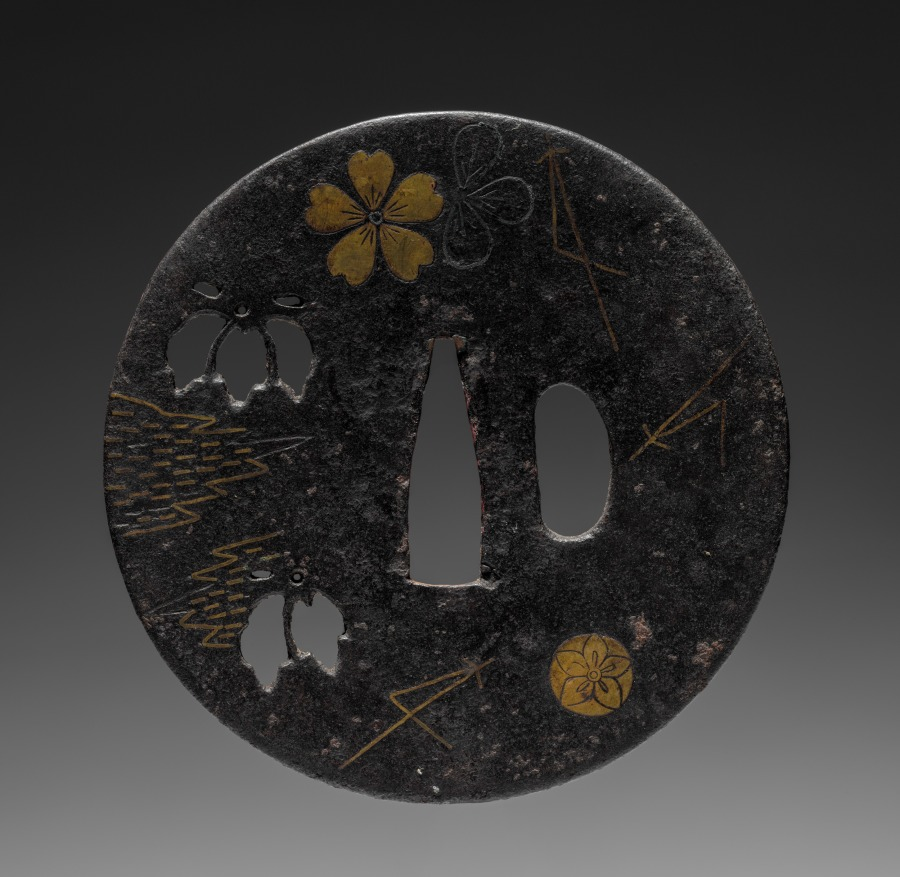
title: Sword Guard (Tsuba)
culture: Japan, possibly Edo period (1615-1868)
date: c. 1615–1868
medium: iron witih brass inlay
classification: Arms and Armor